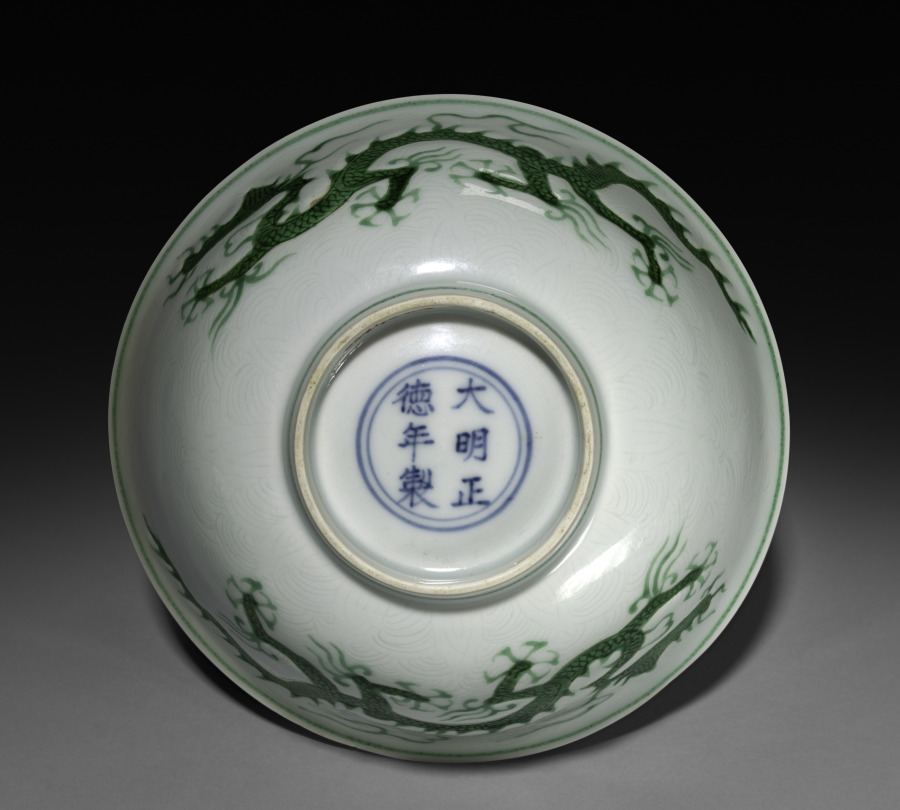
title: Bowl with Dragons in Waves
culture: China, Jiangxi province, Jingdezhen kilns, Ming dynasty (1368-1644), Zhengde mark and reign (1506-21)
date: 1506–21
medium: porcelain with incised decoration and green overglaze enamel and resist enamel decoration on biscuit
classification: Ceramic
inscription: 大明正德年製